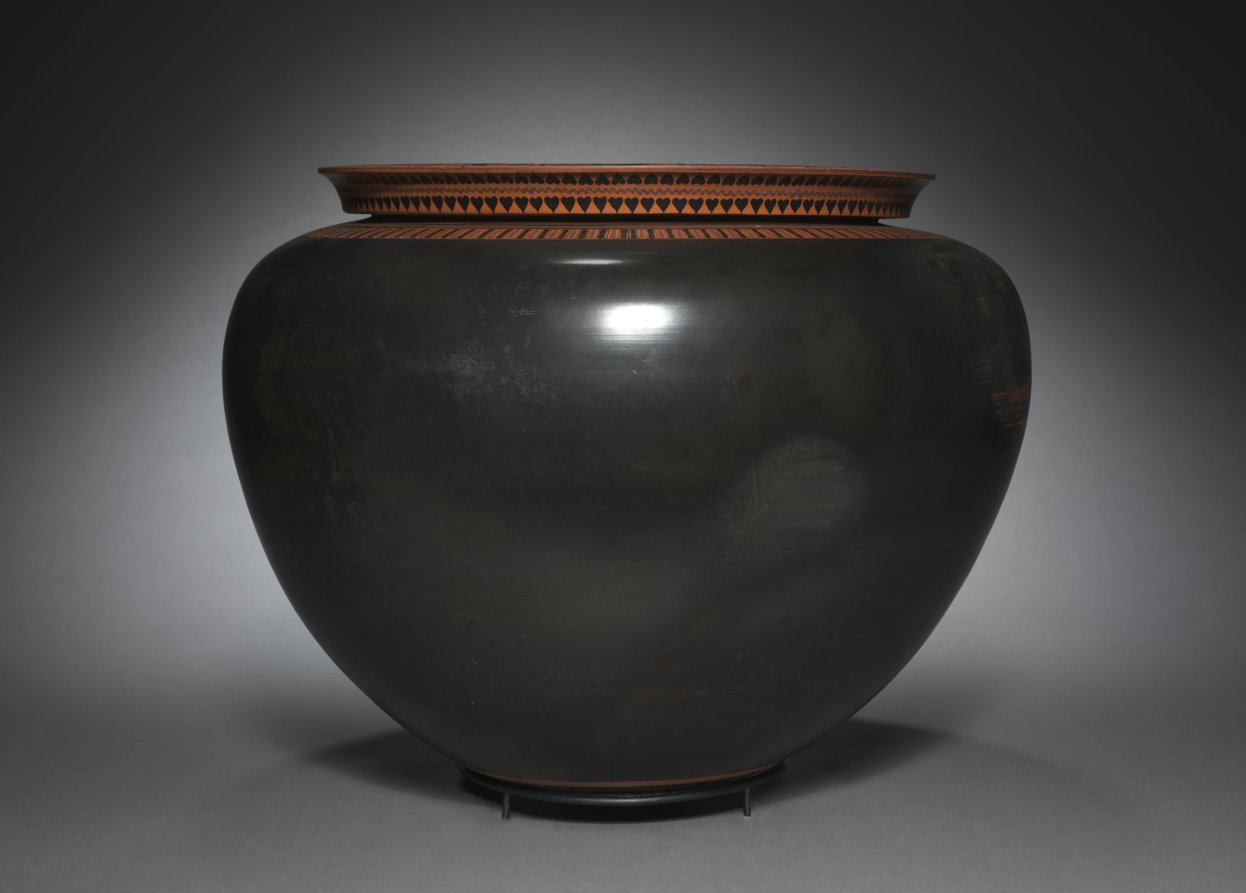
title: Black-Figure Dinos (Mixing Vessel): Warships (Int.); Heroic Scenes (Top)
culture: Greek, Attic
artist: circle of Antimenes Painter (Greek, Attic, active c. 530–510 BCE)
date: c. 520–515 BCE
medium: ceramic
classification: Ceramic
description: Designed for use at a symposium, or drinking party, this large dinos has a wide mouth allowing easy access to its contents—wine mixed with water (and sometimes other ingredients for flavoring). While drinking, symposiasts would often recite poetry and celebrate the mythological exploits of gods and heroes, perhaps prompted by the images painted on their pottery. Here, the vase-painter clearly anticipated such use; when the vessel was full, the ships painted on the inside of the rim would appear to sail across the “wine-dark sea” (to borrow a phrase found frequently in Homer’s Iliad and Odyssey). Other heroic scenes, including Herakles wrestling the Nemean lion and Theseus battling the Minotaur, appear on top of the rim, interspersed with chariots and anonymous combats.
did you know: Unable to stand on its own, this round-bottomed vessel probably once had a separately made base.